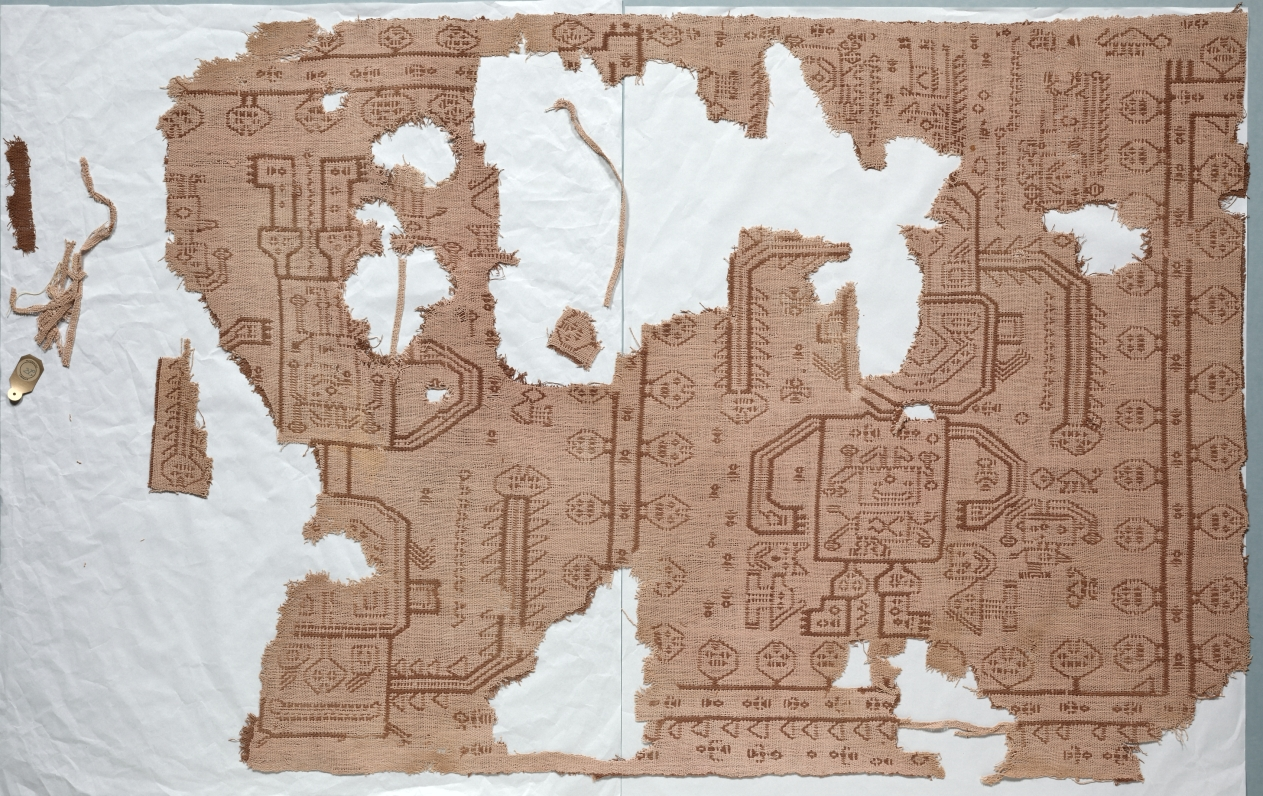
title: Fragment of a Mantle with Oculate Being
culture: Peru, South Coast, Paracas, Carhua?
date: 200–1 BCE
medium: cotton; double-cloth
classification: Textile